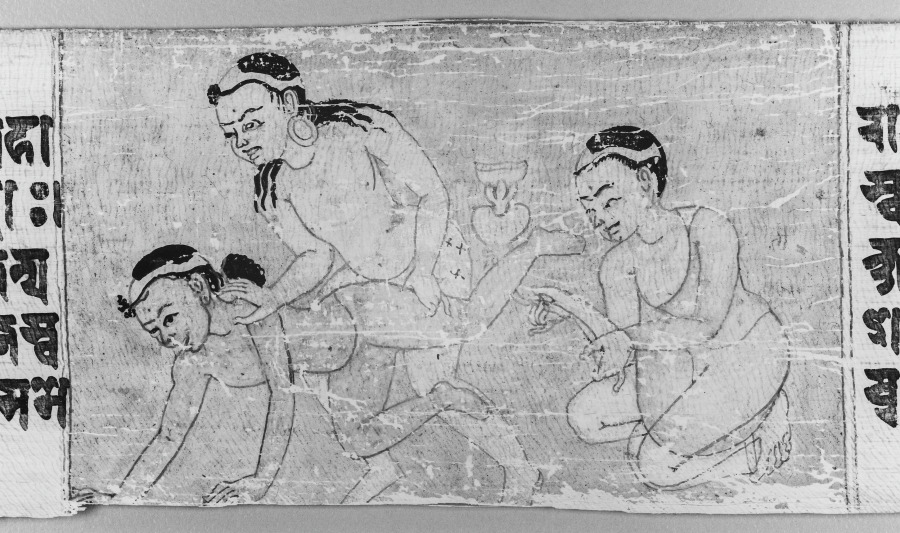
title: Bodhisattva Samantabhadra purifies the path to enlightenment, with Manjushri, folio 348 (verso) from a Gandavyuha-sutra (Scripture of the Supreme Array)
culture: Nepal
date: 1000–1100s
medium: gum tempera and ink on palm leaf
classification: Painting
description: The painting in the center shows a righteous bodhisattva tossing aside a blue-skinned heretic, while an impious blue-clad monk sits behind them, the next to be overpowered by the righteous one. In the painting on the left, the Bodhisattva of Wisdom, Manjushri, brandishes his sword, and at the far right, a Buddhist priest (Vajracharya) sets fire to a Hindu sage in a rocky landscape.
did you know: Blue-clad monks were said to visit prostitutes, drink liquor, and practice extreme tantric rituals.